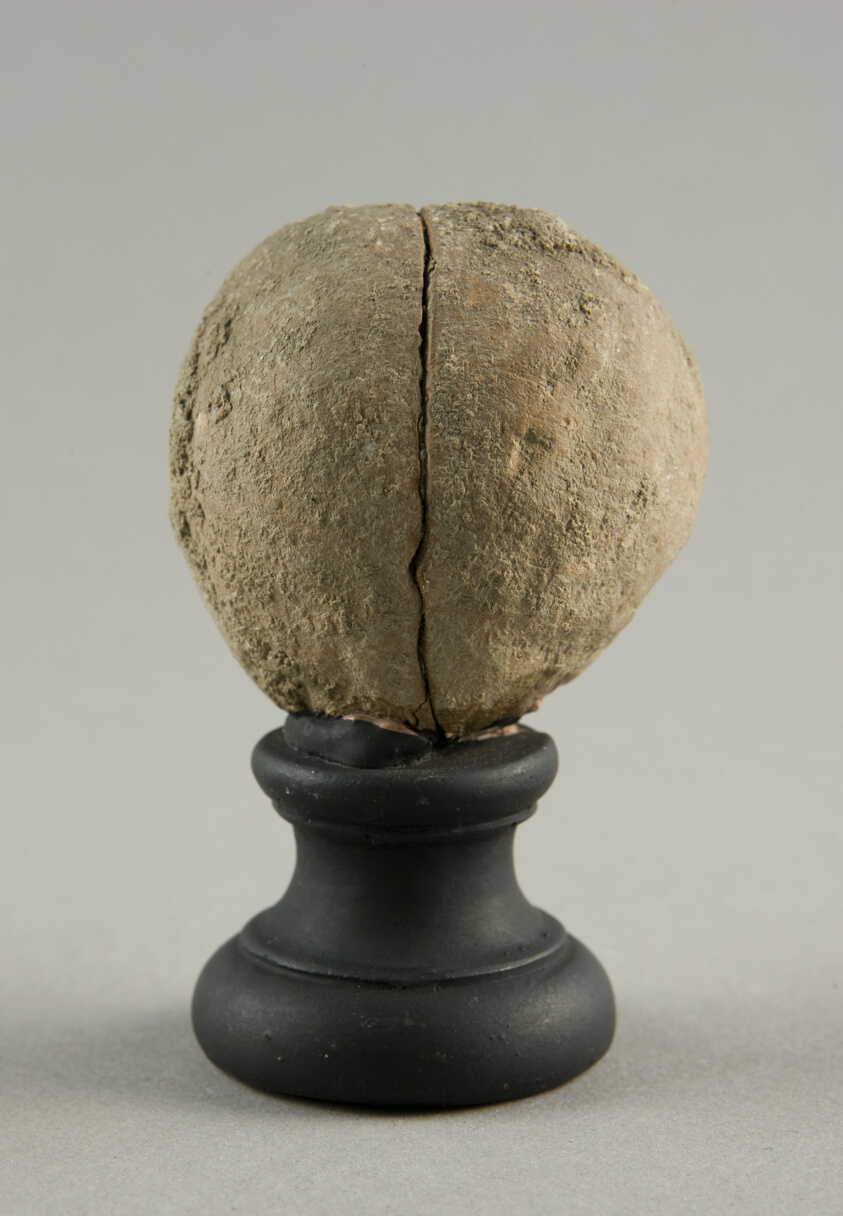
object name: Sculpture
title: Statuette of an Unidentified Object (perhaps an Apple or Pomegranate)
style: greek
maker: Greek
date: 4th-3rd century BCE ?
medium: terracotta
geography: Greece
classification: earthenware; ceramics; sculpture; ancient art